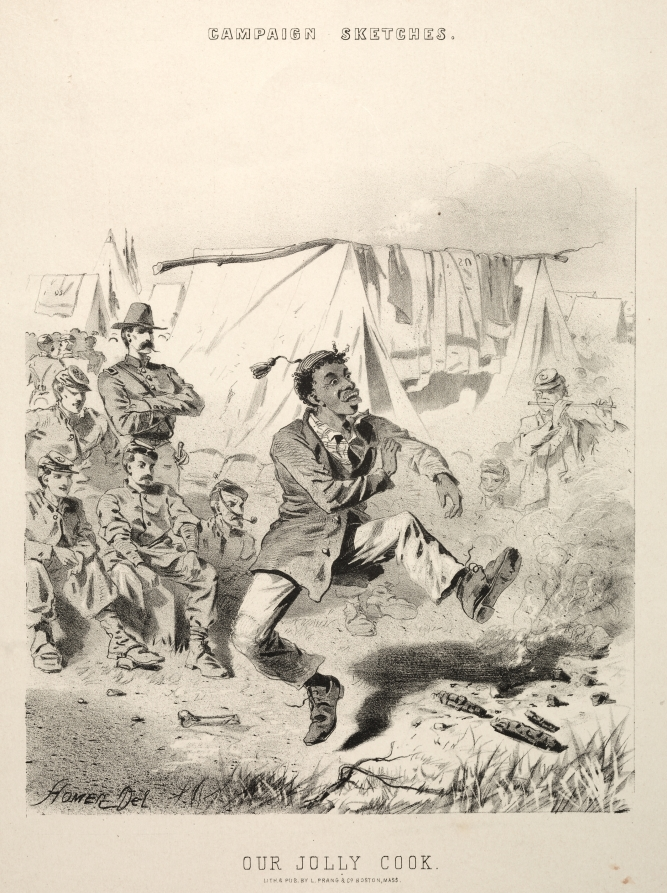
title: Campaign Sketches: Our Jolly Cook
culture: America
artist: Winslow Homer (American, 1836–1910)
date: 1863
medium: lithograph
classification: Print